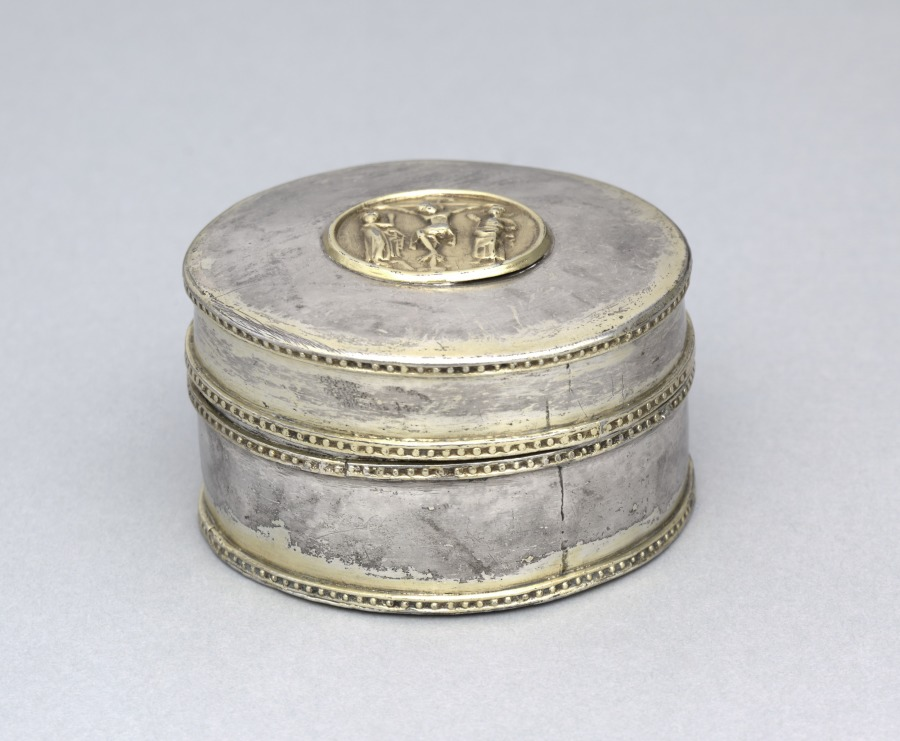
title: Pyx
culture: Austria, probably Salzburg, 14th century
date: c.1300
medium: silver and gilt silver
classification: Metalwork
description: A pyx is a container designed to hold the consecrated Eucharist wafers between masses. It was probably used by the clergy to administer communion to the sick and dying; its small size made it easily portable. The decoration relates to similar liturgical objects made in the ecclesiastical and artistic center of Salzburg for the cathedral treasury of that city.